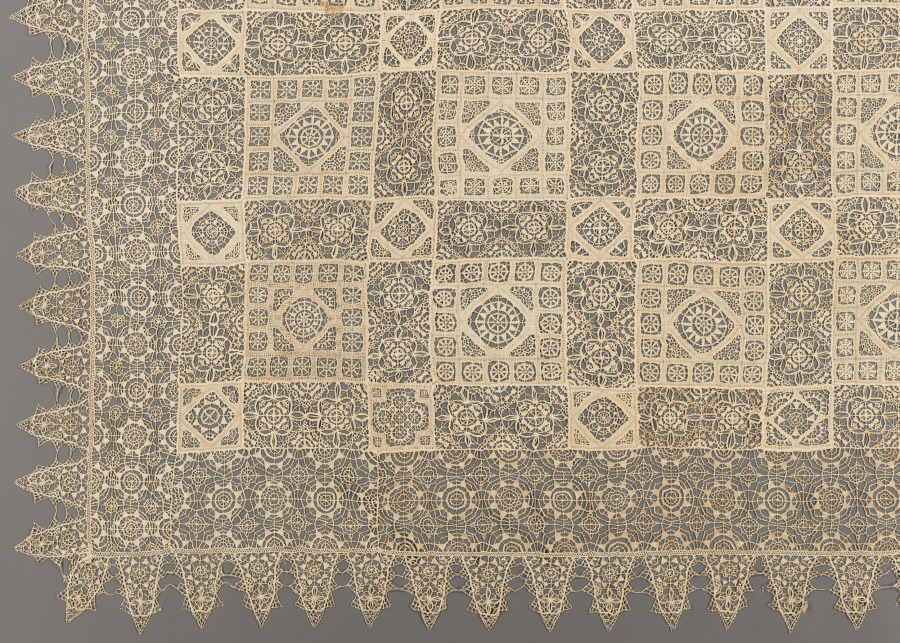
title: Lace Cloth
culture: Italy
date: 1560–1600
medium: Linen; needle lace (cutwork and reticella)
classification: Lace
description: Consisting of more than 80 squares of cutwork (a cut and embellished linen ground) and rectangles of reticella (needle lace), this luxurious cover could have been made by a single person or several people who divided the work. Close looking reveals that the cloth is made with threads of two very slightly different colors: bleached and unbleached linen. Together the sections resemble snowflakes, which are of similar shape and size but vary subtly from one another. The perplexing dark stitches in the upper left corner do not repair damage, and might be the maker’s signature.